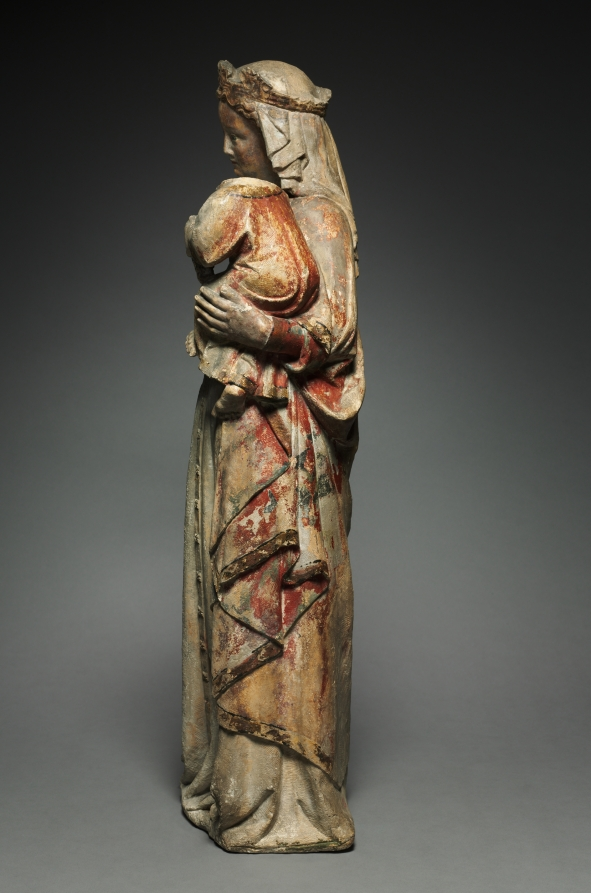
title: Virgin and Child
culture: France, Lorraine, 14th century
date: c. 1315–20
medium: limestone with traces of polychromy and gilding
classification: Sculpture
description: This graceful Virgin and child is a beautiful example from a large number of such figures produced in Lorraine, in eastern France, during the early 1300s. Lorraine at the time had a well-established artistic tradition and was under the rule of the Counts of Bar with established cultural links to both Flanders and England. Many of the surviving Lorraine Virgins share common characteristics consistent with this example--the swaying posture, with the weight of the Virgin placed on the left foot; and an open mantle with an exposed belted gown, the girdle itself trailing to the ground and ornamented with rosettes. Such standing figures were likely made for use in parish churches, cathedrals, aristocratic oratories, and monastic chapels, and attest to the intense veneration rendered to the Virgin during the period.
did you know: The CMA has a rare example of a similar woman’s belt (1930.742).